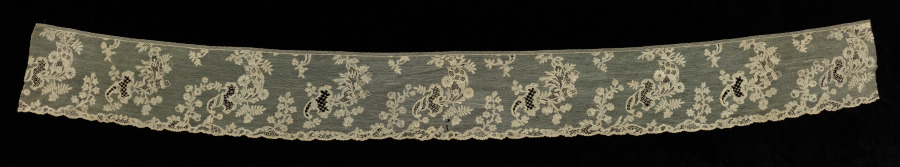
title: Lace Flounce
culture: Italy, Burano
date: 1700s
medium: Linen: needle lace (Burano Point)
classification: Lace